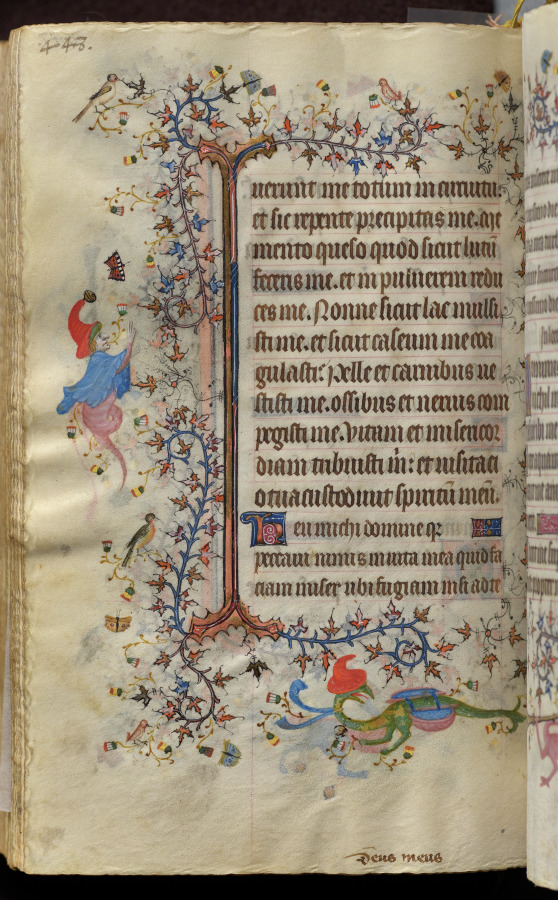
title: Hours of Charles the Noble, King of Navarre (1361-1425): fol. 218v, Text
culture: France, Paris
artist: Master of the Brussels Initials and Associates (French)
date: c. 1405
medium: ink, tempera, and gold on vellum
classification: Bound Volume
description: This precious volume was obviously highly prized by its owner, the French-born King of Navarre, who had his coat of arms painted on no less than twenty folios. Rather than directly commissioning this manuscript from a specific workshop, it seems that Charles the Noble acquired his book of hours -- perhaps ready-made for the luxury market -- while on a trip to Paris in 1404-05. A collaborative effort, six painting styles are evidenced within the pages of this codex, those of two Italians, two Frenchmen, and two Netherlanders. The painter who was responsible for the planning and decoration of the book, and who produced seventeen of the large miniatures, was a Bolognese artist known as the Master of the Brussels Initials. His principal assistant, responsible for most of the borders, was a Florentine who signed his name "Zecho" da Firenze on folio 208 verso.